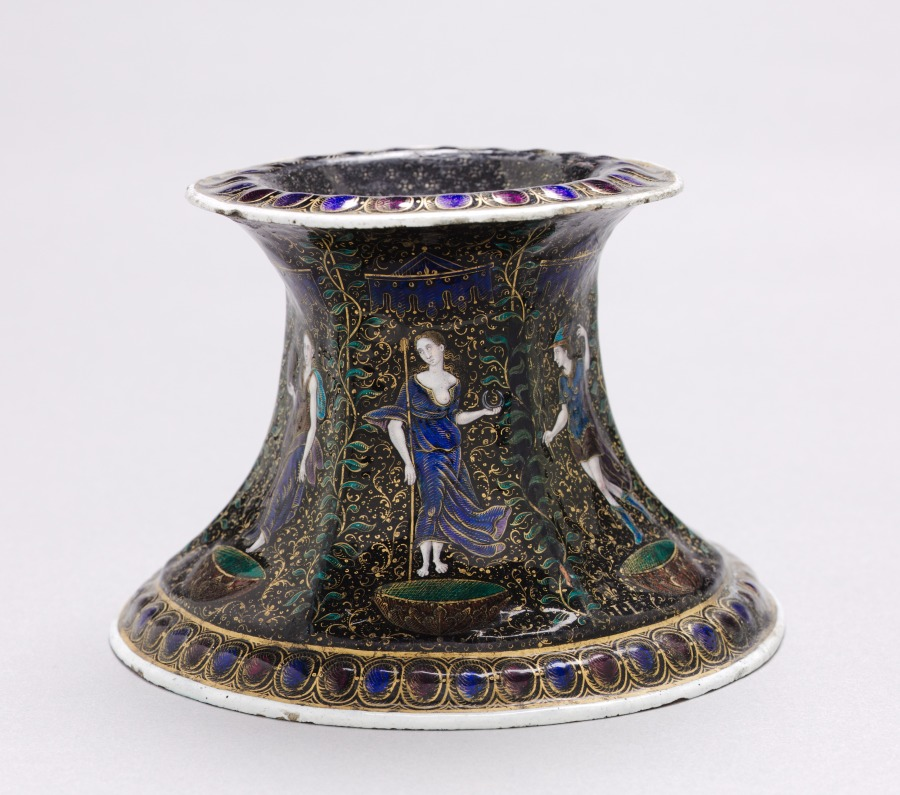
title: Salt Dishes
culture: France, Limoges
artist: Jean Limousin (French, 1528–c. 1610)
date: early 1600s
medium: painted enamel on copper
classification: Ceramic